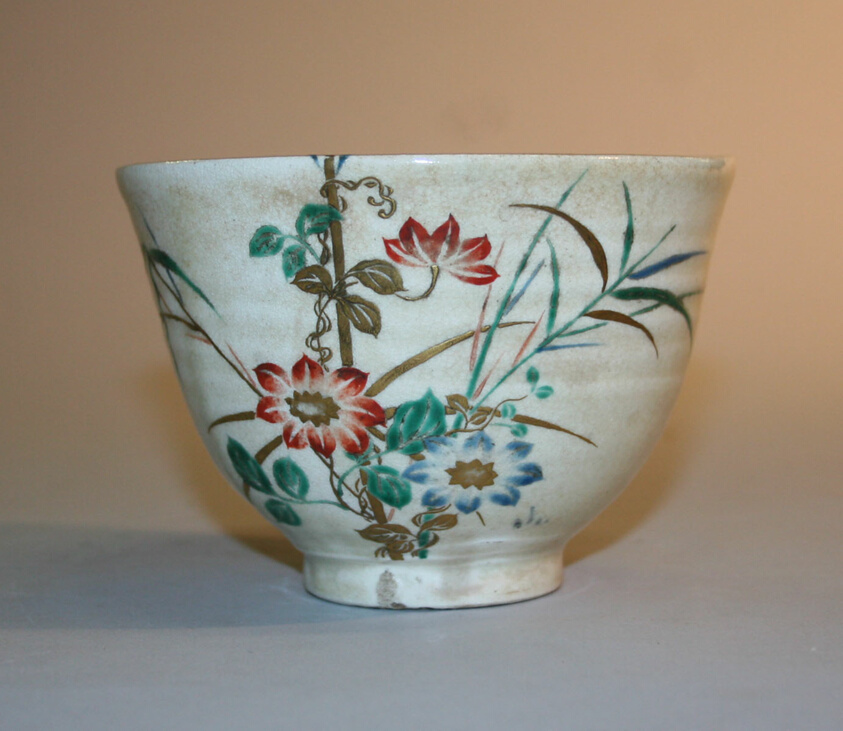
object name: Decorative Arts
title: Satsuma Ware Teabowl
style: Japanese (culture or style)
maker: Japan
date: 18th century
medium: Glazed stoneware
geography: Japan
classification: drinking vessel; asian art; ceramics; decorative arts